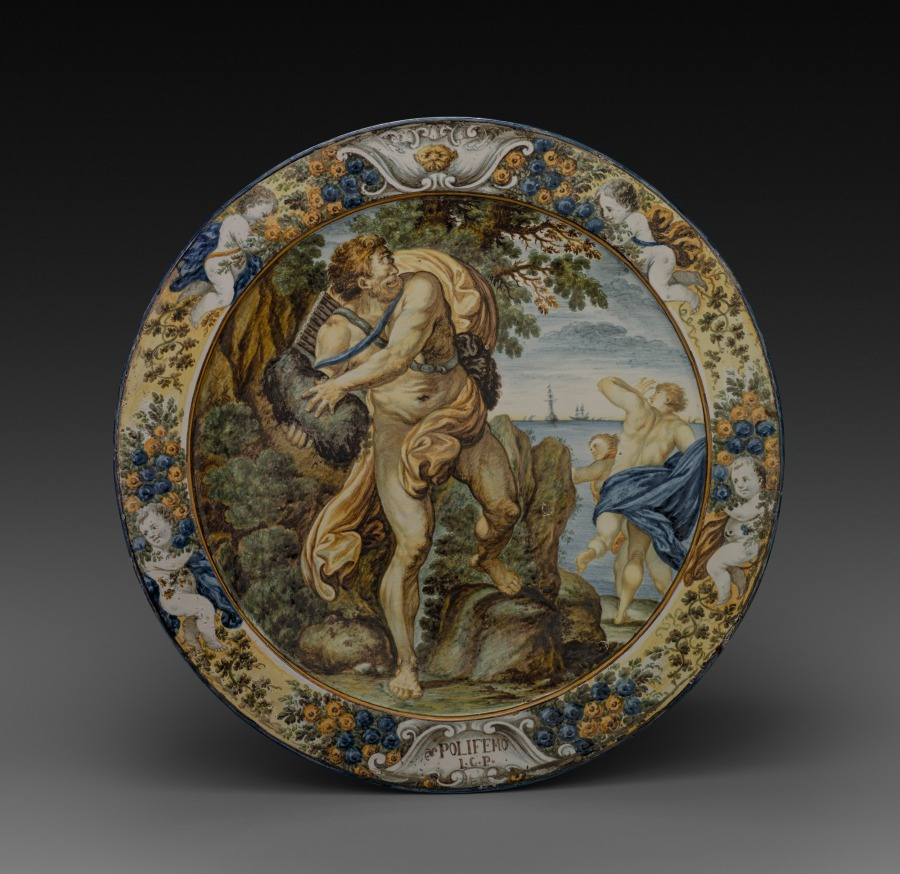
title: Plate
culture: Italy, Castelli, 18th century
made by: Liborius Grue (Italian, 1702–1776)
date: 1725–1775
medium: tin-glazed earthenware (maiolica)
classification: Ceramic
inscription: on front of plate: Polifemo L.G.P.; on back, signed: L.G.P(inxit).